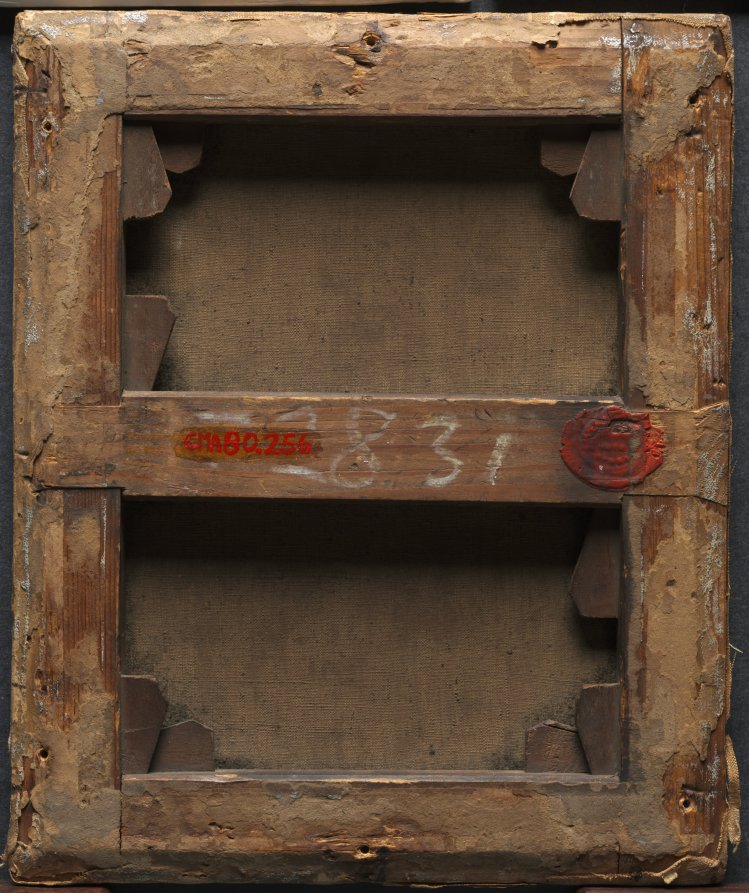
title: Offering to the God Pan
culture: France, 19th century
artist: Paul Delaroche (French, 1797–1856)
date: 1855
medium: oil on fabric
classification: Painting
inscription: Signed lower left: Paul DelaRoche 1855